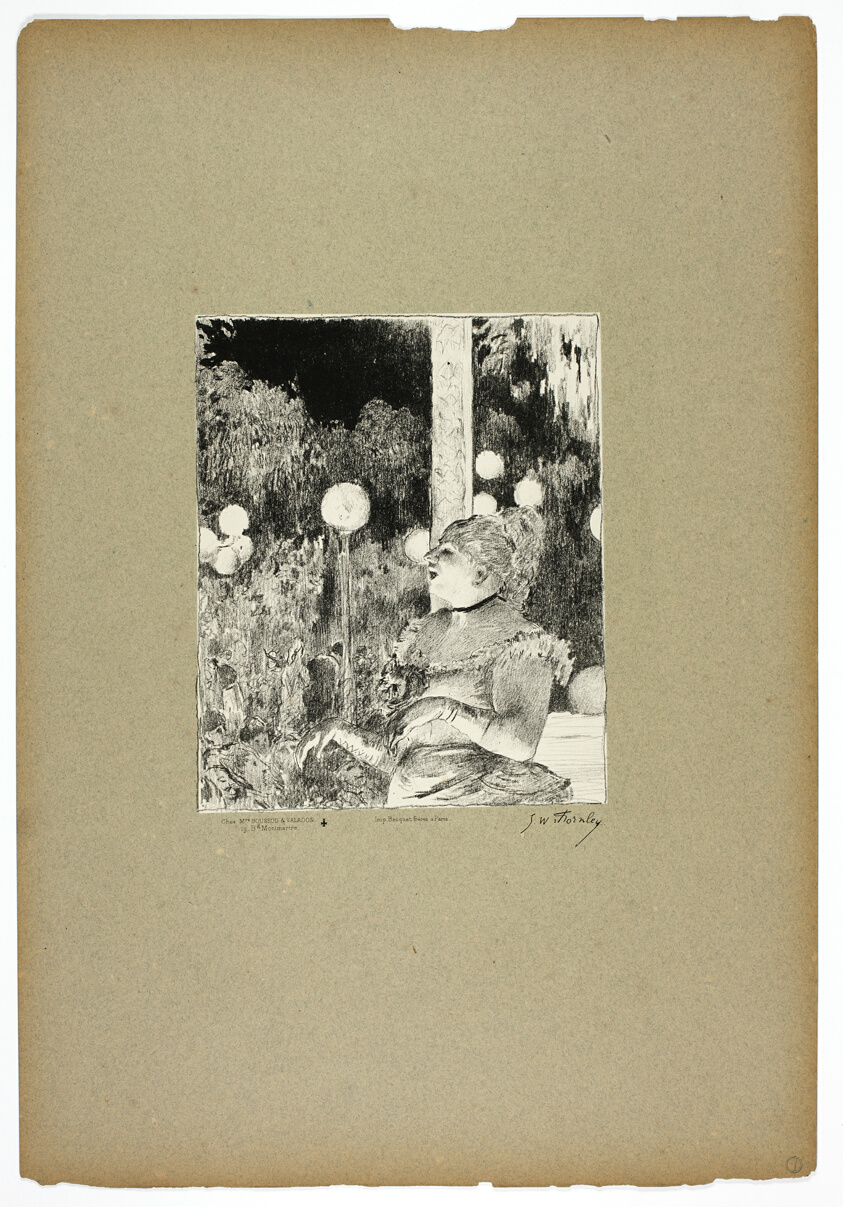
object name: Print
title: Thérésa Valdon, singing the 'Song of the Dog'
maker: Georges-William Thornley (French, 1857-1935); after Edgar Degas (French, 1834-1917); printed by Atelier Becquet (French, 19th century); published by Boussod, Valadon, & Company (French, 18th-19th century)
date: 1889–90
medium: Lithograph on paper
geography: France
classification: lithograph; print; prints and drawing